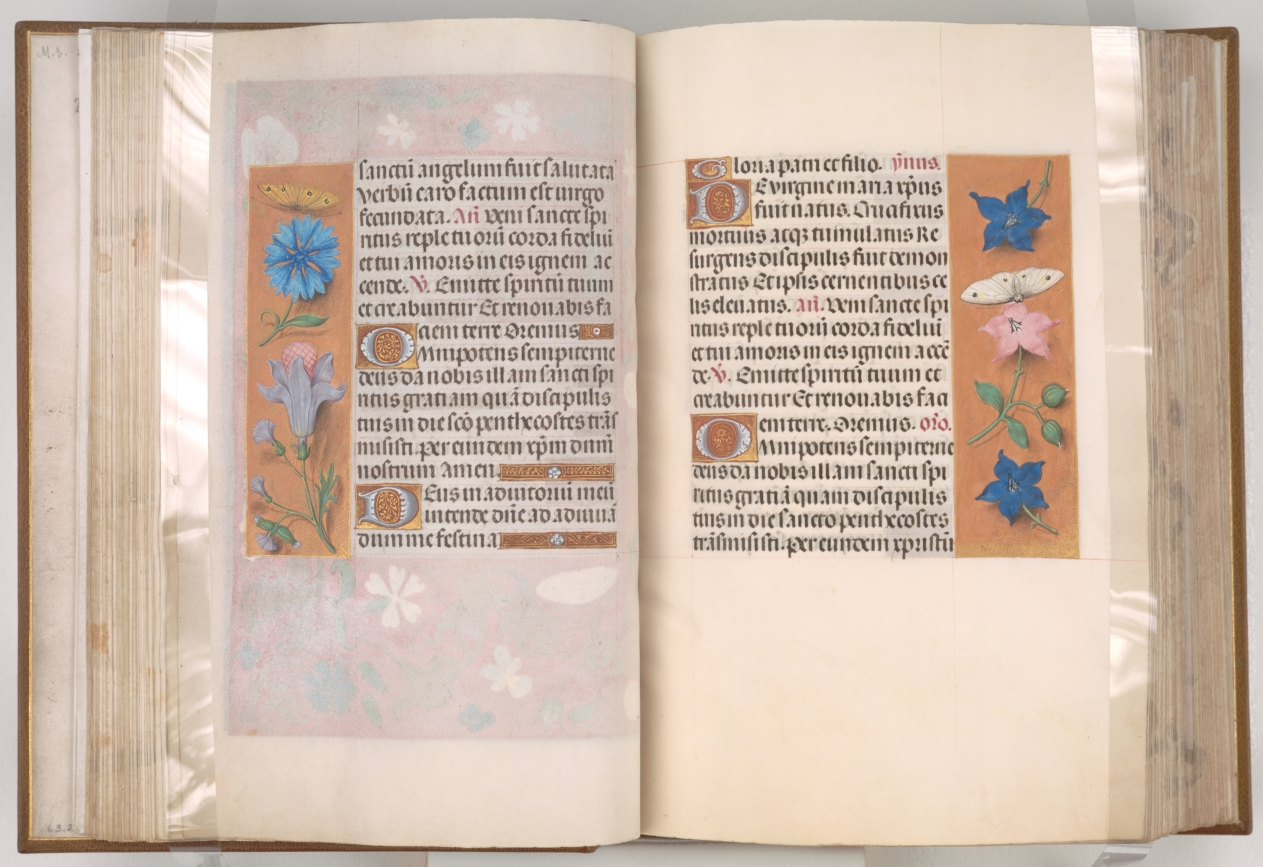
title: Hours of Queen Isabella the Catholic, Queen of Spain: Fol. 33r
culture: Flanders, Ghent and Bruges, late 15th century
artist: Master of the First Prayerbook of Maximillian (Flemish, c. 1444–1519)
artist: and Associates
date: c. 1500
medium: ink, tempera, and gold on vellum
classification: Bound Volume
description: A great lover of Flemish art, Queen Isabella treasured her many devotional books. This deluxe manuscript was created for her private devotions by highly organized and distinctly talented manuscript painters active in Ghent and Bruges. The Ghent-Bruges school represents the culmination of Flemish book painting, whose main features were the use of rich colors, illusionistic effects, a love of landscape, and a strong sense of visual narrative. Manuscripts produced by this circle of artists are renowned for their border decoration featuring a rich variety of realistically painted flowers, scrolling acanthus leaves, birds, and butterflies.